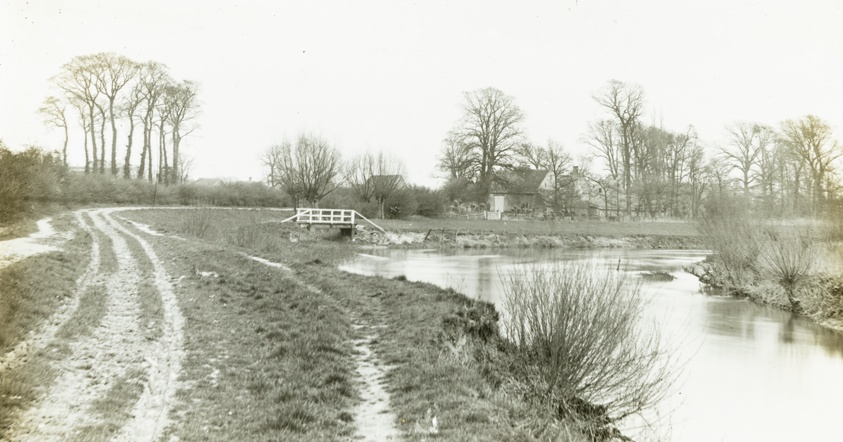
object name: Photograph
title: Kelmscott Manor: From the Thames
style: Pictorialism, 19th century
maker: Frederick H. Evans (English, 1853–1943)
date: 1896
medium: Lantern slide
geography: England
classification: photograph; photography